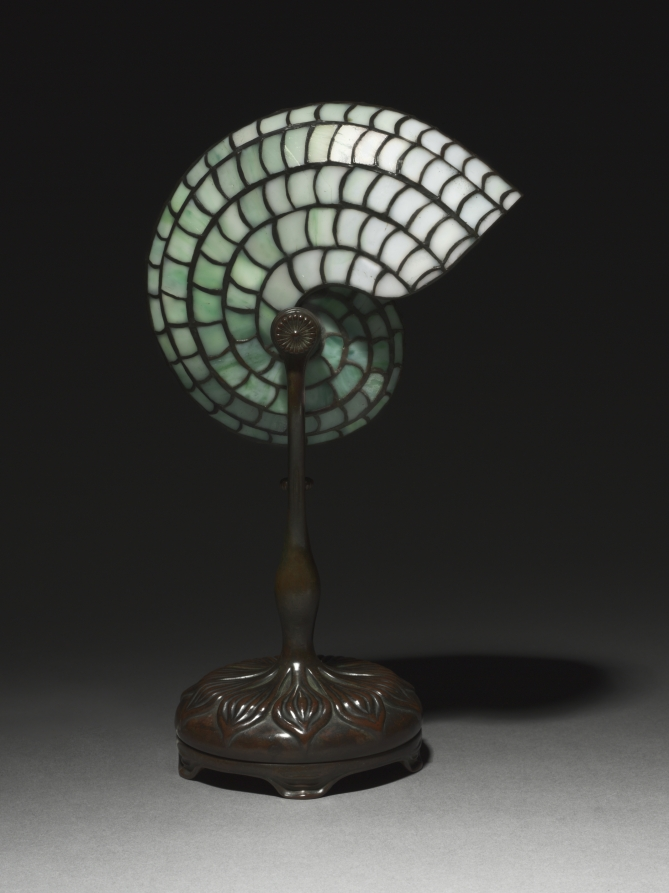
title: Nautilus Reading Lamp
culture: America, early 20th Century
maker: Tiffany Glass & Decorating Company (America, New York, 1892–1902)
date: c. 1899–1902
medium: bronze, leaded glass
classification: Metalwork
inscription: stamped on underside: Tiffany Studios/New York/25891/TDGCo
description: Benjamin Hubbell, the architect of the Cleveland Museum of Art, acquired this vase from Louis Comfort Tiffany, with whom he collaborated on various projects. The shape of the nautilus shell provides the perfect space to conceal a light bulb, the newest form of technology at the time. As a result, this lamp was a critical success and sold both in this original form and with the later alteration of a bronze mermaid for the stand and an actual nautilus shell for the shade.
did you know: A lamp of this design was first featured in Siegfried Bing's 1899 display of Louis Comfort Tiffany's designs at the Grafton Galleries in London then in Tiffany's own stand at the 1900 Paris Exposition Universelle.